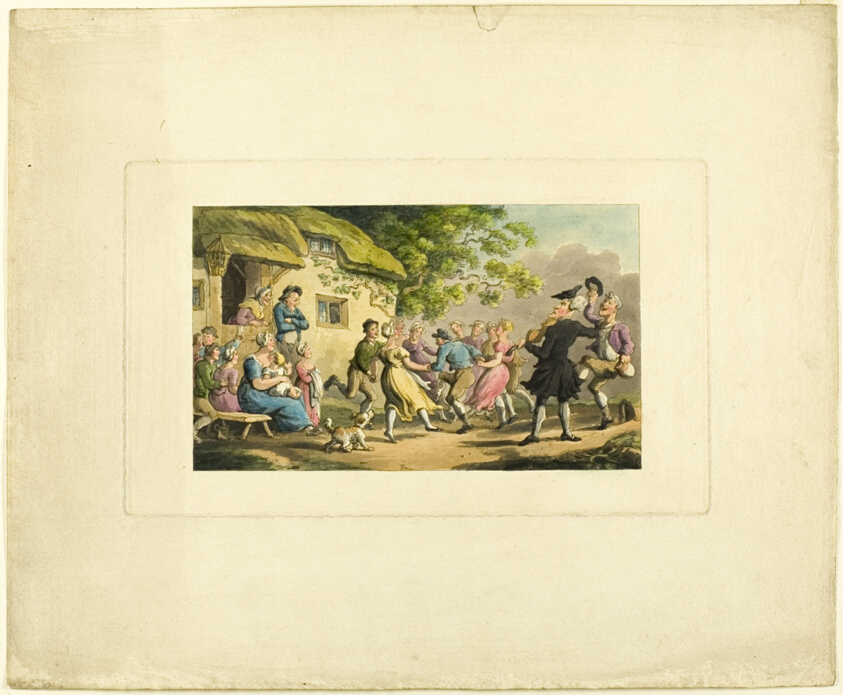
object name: Print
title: Doctor Syntax Rural Sport, from The Tour of Doctor Syntax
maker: Thomas Rowlandson (English, 1756-1827); published by Rudolph Ackermann (English, 1764-1834)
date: c. 1812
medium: Hand-colored etching and acquaint on ivory wove paper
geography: England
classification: etching; print; prints and drawing